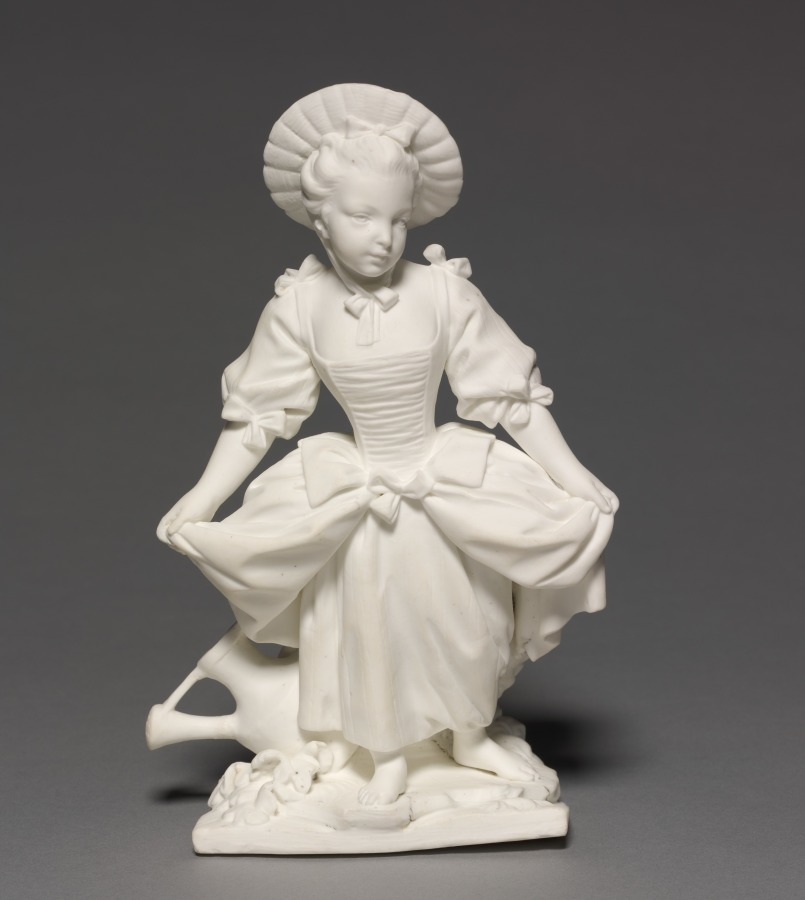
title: Figure Pair of the Dancer (La Danseuse) and the Bagpiper (Le Joueur de Musette)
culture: France, Vincennes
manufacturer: Vincennes Porcelain Factory (France, 1740–56)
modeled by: Pierre Blondeau (French)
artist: after a design by François Boucher (French, 1703–1770)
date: 1748–52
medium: unglazed soft-paste porcelain (biscuit porcelain)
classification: Ceramic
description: In the mid-18th century, the designs of reputed painter François Boucher were regularly reproduced at the Vincennes factory as figures or paintings on porcelain. A series of eight children designed by Boucher were referred to in factory records as the Enfants de Boucher (children of Boucher) and regularly reproduced. The depictions of these barefoot children in peasant attire engaged in pastoral pursuits represent the virtuous simplicity the 18th-century French elite ascribed to representations of rural life.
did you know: Unglazed porcelain figures were a long-lasting alternative to the decorative sugar sculptures displayed alongside intricately designed 18th-century French dinner services.